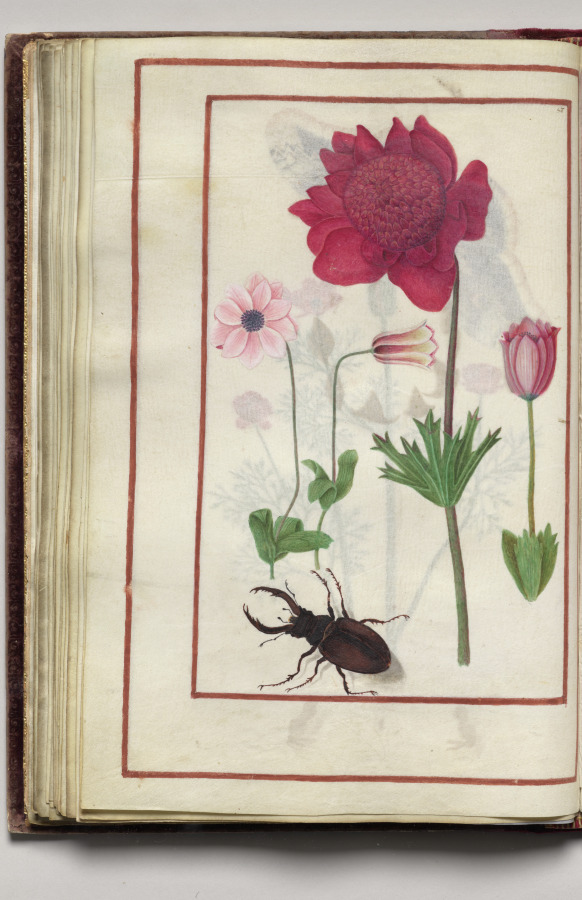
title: Red Anemones? with Stag Beetle, folio 29 (verso), from Florilegium (A Book of Flower Studies)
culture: France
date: 1608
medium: watercolor, ink, silver, and gold over occasional traces of pencil, on vellum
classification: Bound Volume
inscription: Dated: Poitiers 1608 (on frontispiece) Signed: On frontispiece in black ink, lower right: Van Kuyk Notation on drawing: Frontispiece: in pencil, lower margin: * élève de Van Kessel, peintre flammand (* in pencil also appears in front of Van Kuyk's name).